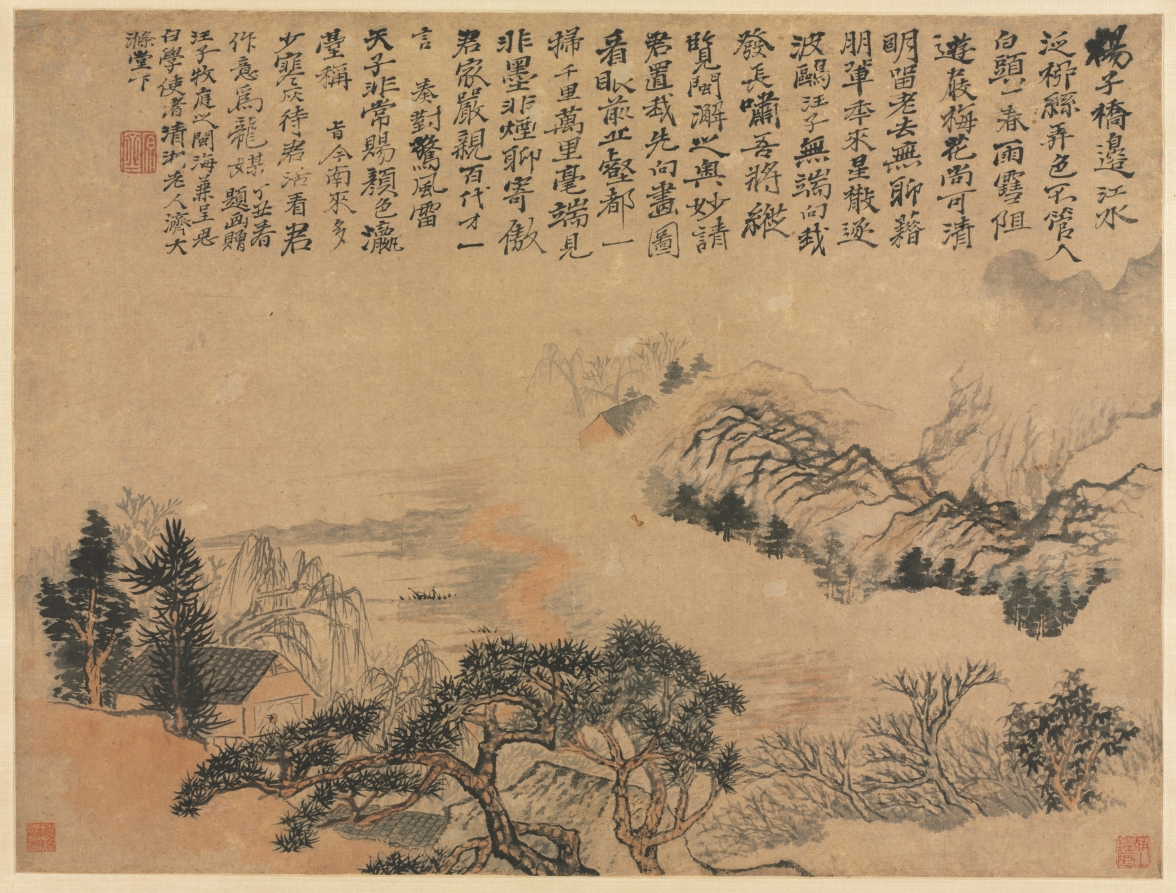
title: Spring Mist over Jiangnan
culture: China, Qing dynasty (1644-1911)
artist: Shitao (Chinese, 1642–1707)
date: 1697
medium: Hanging scroll; ink and light color on paper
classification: Painting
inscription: 揚子橋邊江水泛，柳絲弄色不管人白頭。/ 一春雨雪阻遊屐，梅花尚可清明留。/ 老去無聊藉朋輩，年來星散隨波鷗。/ 汪子無端向我發長嘯，吾將縱覧閩澥之奧妙。/ 請君置我先向畫圖看，眼前丘壑都一掃。/ 千里萬里毫端見，非墨非煙聊寄傲。/ 君家嚴親百代才，一言奏對驚風雷。/ 天子非常賜顏色，灜台稱旨今南來。/ 多少寒灰待君活，看君作意為龍媒。 丁丑春題畫，贈汪子牧庭之閩海。兼呈思白學使。清湘老人濟大滌堂下。[印]原濟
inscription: 2 colophons and 7 additional seals: 1 colophon and 4 seals of He Yuanyu 何瑗玉 (1840-?); 1 colophon and 2 seals of Li Xinhui (19th-20th c.); 1 seal unidentified.